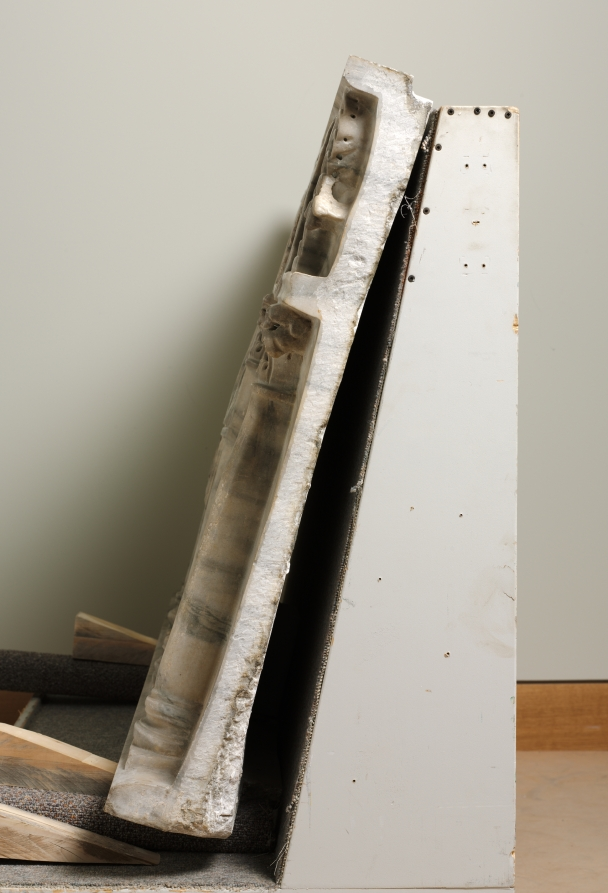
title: Altar Front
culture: early Byzantium, Constantinople or Ravenna, Byzantine period, 6th century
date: c. 540–600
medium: marble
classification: Sculpture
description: This carved marble panel resembles the front of an Early Byzantine sarcophagus, or coffin. While its decoration is typical of those produced in the Italian city of Ravenna during the 500s, its size is considerably smaller, indicating that the panel may instead have been made as an altar front. It is likely that the small window between the center columns with its opened curtains once allowed the faithful to contemplate a precious reliquary placed inside. The decorative repertoire of the panel includes both architectural forms--arches, pediments, and columns--and a number of symbols commonly found in Early Christian art including scallop shells, lambs, palms, and crosses that represent the concepts of life, the sacrifice of Christ, victory over death, and eternal life.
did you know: This marble altar was likely in a Byzantine church that was opulently decorated with mosaics, rich textiles, and gilded lamps. Worshipers would have witnessed the rituals of faith that occurred at the altar, enshrined behind a barrier called a templon, and accessible only to the clergy.